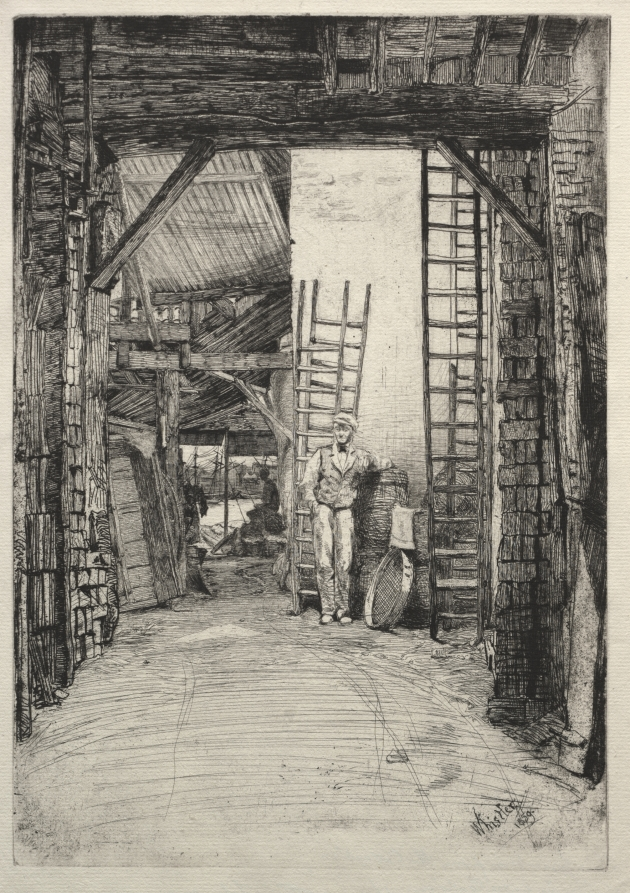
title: The Lime-burner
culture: America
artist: James McNeill Whistler (American, 1834–1903)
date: 1859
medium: etching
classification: Print